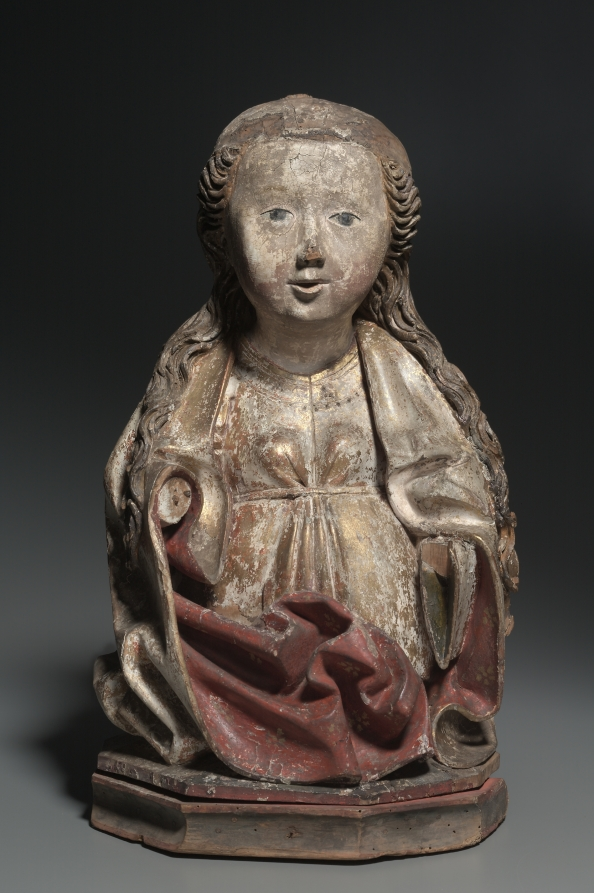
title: Female Bust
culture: Austria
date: c. 1470–1500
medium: painted and gilded lindenwood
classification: Sculpture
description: This female bust is part of a series of three in the museum's collection. The identity of the figures has been speculated by scholars but without resolution. Because this and the other female busts in the series do not retain their attributes, it is difficult to know their original purpose. It is possible that they may have once formed a group of female saints from the predella of a large altarpiece. Since the sculpture is not carved in the round, this hypothesis has merit. Another recent proposal is that this and the other sculptures may be from a series of female busts representing the wise and foolish virgins referenced in Matthew 25:1-13, a parable by Jesus admonishing listeners to be spiritually prepared.